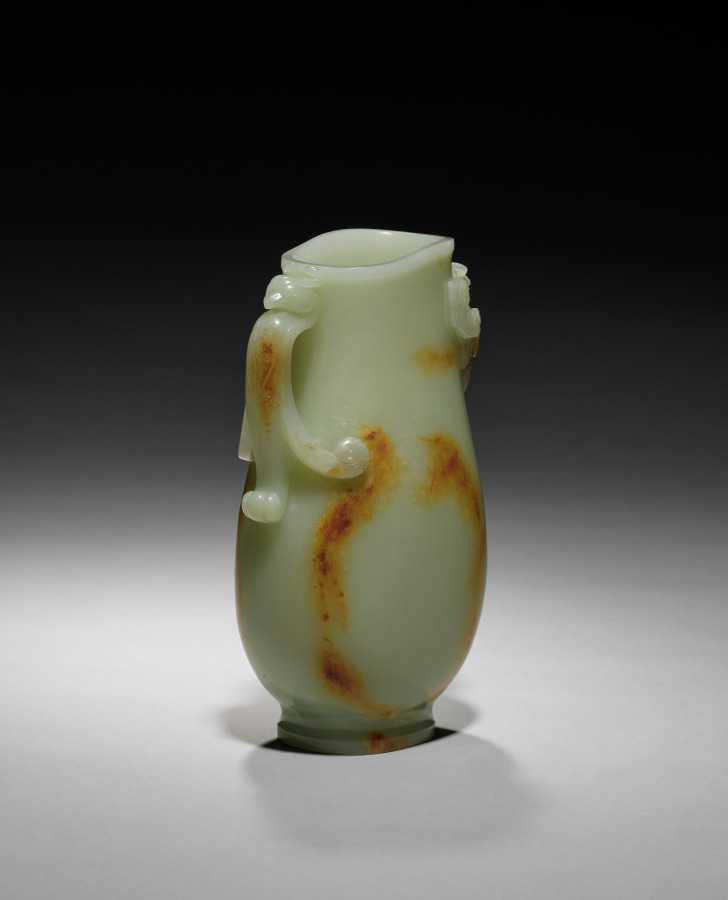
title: Pitcher (Gong) with Dragon and Bird-Headed Handle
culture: China, Qing dynasty (1644–1911)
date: 1700s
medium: pale greenish-white jade with brown markings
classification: Jade